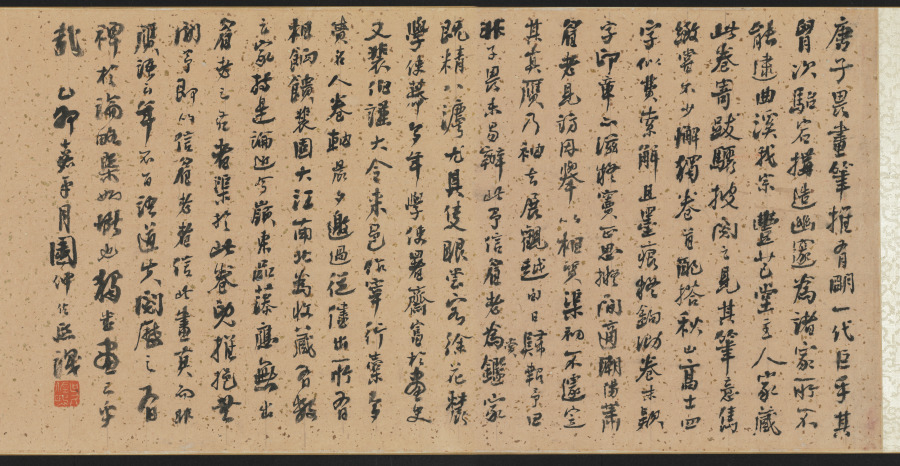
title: Scholar-Hermits in the Autumn Mountains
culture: China, Ming dynasty (1368–1644)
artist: Tang Yin (Chinese, 1470–1523)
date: 1500–1510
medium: handscroll, ink and light color on silk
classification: Painting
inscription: Artist's signature and 2 seals at end of scroll: Tang Yin [seals] T'ang Po-hu; T'ang Tzu'wei t'u-shu.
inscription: Title on frontispiece by Li Cho-kung (dates unknown).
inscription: 1 colophon and 11 additional seals: 1 colophon dated 1915 of Wu Tso-hsi (19th-20th c.); 2 seals of Gao Qifeng 高奇峰 (1889–1933); 5 seals of C. C. Wang 王季遷 (1907–2003); 4 seals unidentified.